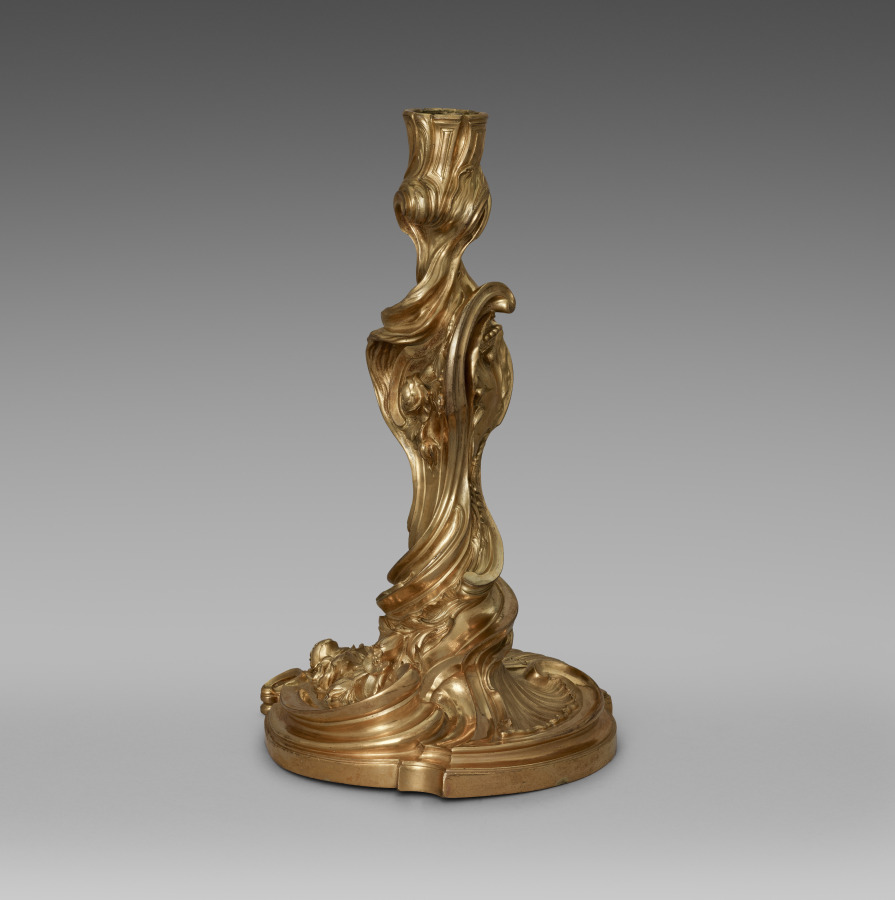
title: Candlestick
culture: France, 18th century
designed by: Juste-Aurèle Meissonnier (French, 1695–1750)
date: c. 1740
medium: gilt metal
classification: Furniture and woodwork